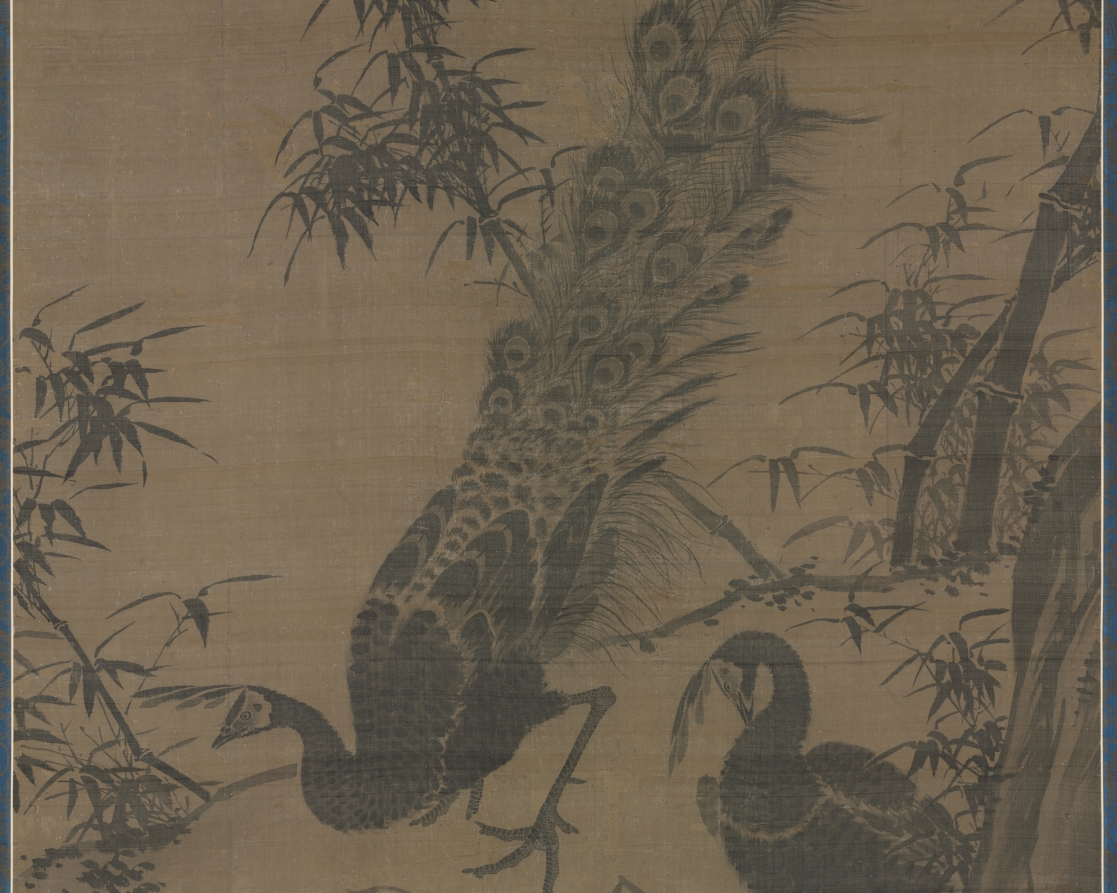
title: A Pair of Peafowl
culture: China, Ming dynasty (1368–1644)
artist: Lin Liang (Chinese, 1416–1480)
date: late 1400s-early 1500s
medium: hanging scroll, ink on silk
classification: Painting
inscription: 林良. [印] 以善圖書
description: The peacock, identified by the flamboyant tail, is paired with a female peahen to its right. In lowering her head, the hen seems to show respect to the male peacock. With his articulate brushstrokes and strong contrasting tones, Lin Liang’s representation in black ink appears as vivid as Yin Hong’s colorful peacock (1974.31). The painter skillfully uses wet and dry ink as well as broad and thin washes to represent the plumage of the bird. The surface of the rocks, depicted in powerful sweeping strokes, recalls the landscape painting style of the Zhe School, which specialized in expressive brushwork.